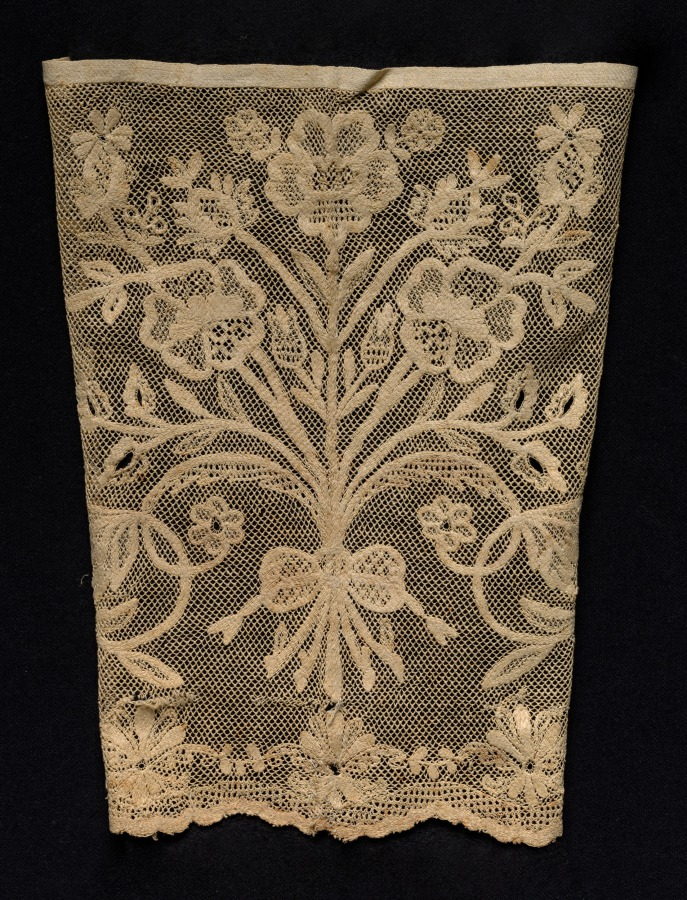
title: Cuff with Floral Vines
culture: Unassigned, 1800s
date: 1800s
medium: Bleached linen (est.): needle lace, filet/lacis (knotted ground and darned in one direction)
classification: Lace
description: In this lace cuff (one of a set, see 1936.226), scrolling vines with budding flowers emerge from a tied bow, creating a stylized bouquet. A scrolling vine with budding vegetation or a tendril motif is a recurring pattern in needle lace. The frequent use of the motif, adapted in lace from different centuries and regions, suggests that it was found in a pattern book.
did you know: From the 15th century, lace cuffs were among the most popular ways to wear and display this costly textile.